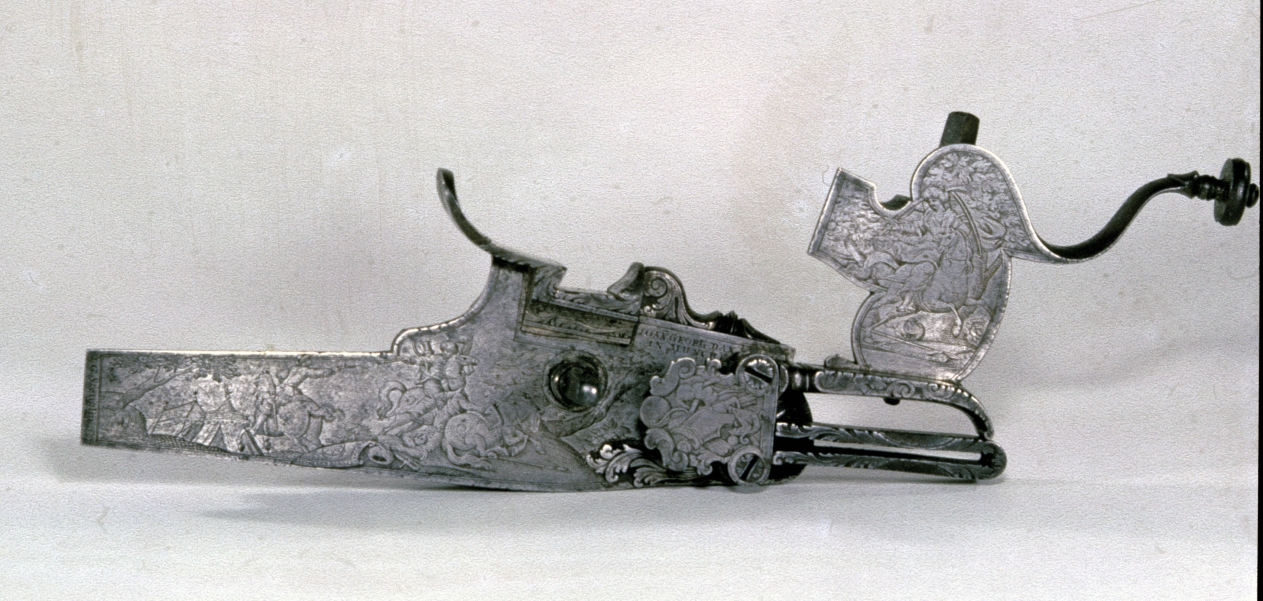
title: Wheel-Lock from a Hunting Rifle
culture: Germany, Munich, 18th century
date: c. 1720–40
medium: steel, engraved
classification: Arms and Armor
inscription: on lock: IOAN GEORG DAX IN MUNCHEN; engraver's signature: I.C. Stenglin Sr.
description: At the beginning of the 1500s a new type of ignition system was invented: the wheel-lock, the first self-igniting mechanism for guns. This type of ignition involved a piece of iron pyrites held in the jaws of a cock. When the trigger was pulled the pyrites pressed against the serrated edge of a prewound revolving wheel, creating a shower of sparks that ignited priming powder in a pan on top of the lock. This action sent a flash of flame through the vent hole to explode the main charge in the breech of the barrel. Originally part of a deluxe hunting rifle, the lock plate's entire surface is engraved in a chaotic scene. Combating cavaliers, Turks, acanthus leaves, and trophies cover every bit of space.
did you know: The engraver's signature, I.C. Stenglin Sr., can be seen on the edge running vertically.